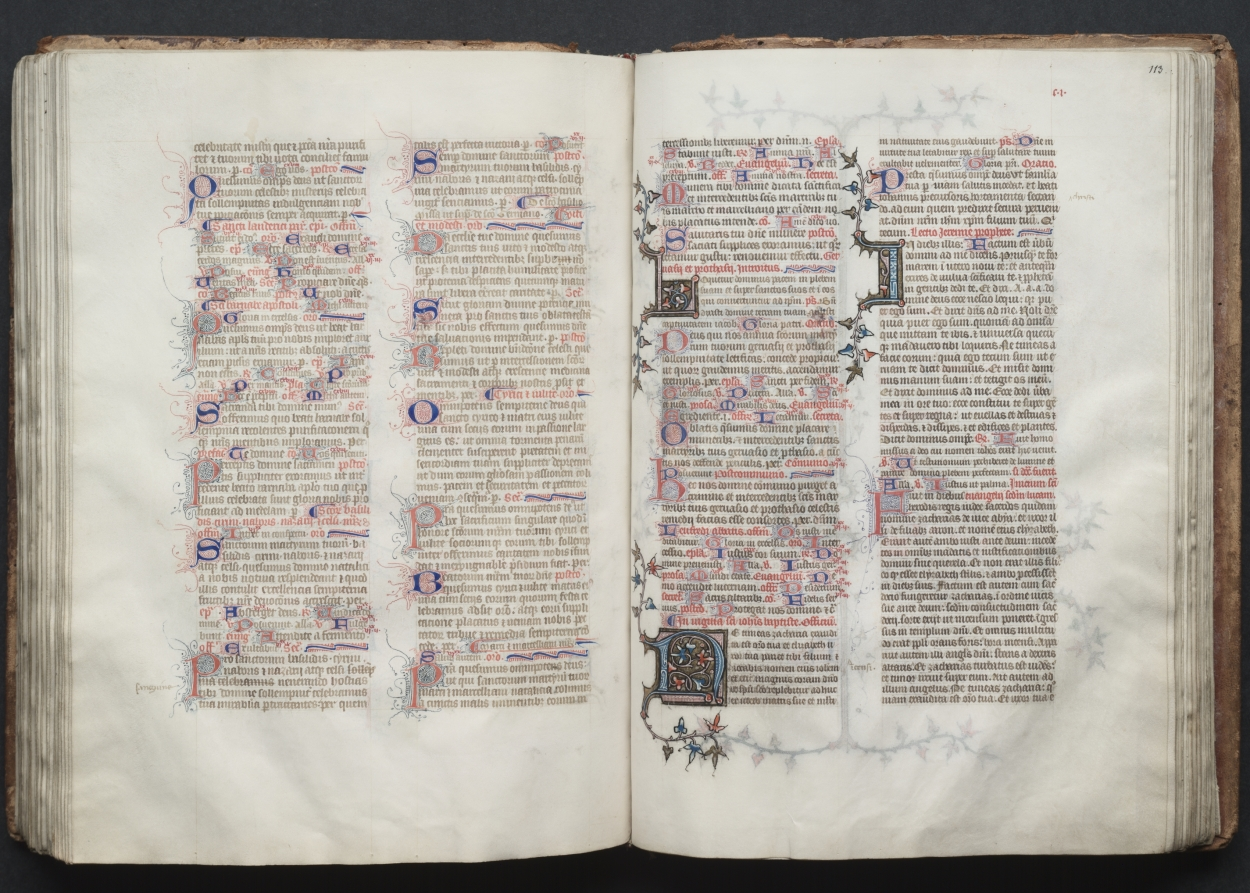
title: The Gotha Missal: Fol. 112v, Text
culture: France, Paris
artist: Master of the Boqueteaux (French)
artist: and Workshop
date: c. 1375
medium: ink, tempera, and gold on vellum; blind-tooled leather binding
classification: Bound Volume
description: The style and quality of this manuscript's decoration is typical of deluxe Parisian books made for aristocratic or royal patrons. Most of the book's decoration appears to be the work of the Master of the Boqueteaux, an artist active at the court of King Charles V (died 1380). His style was apparently shared by a number of book illuminators working in and around Paris. It is very possible that the Gotha Missal belonged to Charles V, but is not provable because the manuscript has no royal portraits and lacks a colophon. Given the book's magnificent decoration, however, it would seem that it was produced for a Valois prince, if not for the king himself. The manuscript receives its name from the German dukes of Gotha, its later owners.